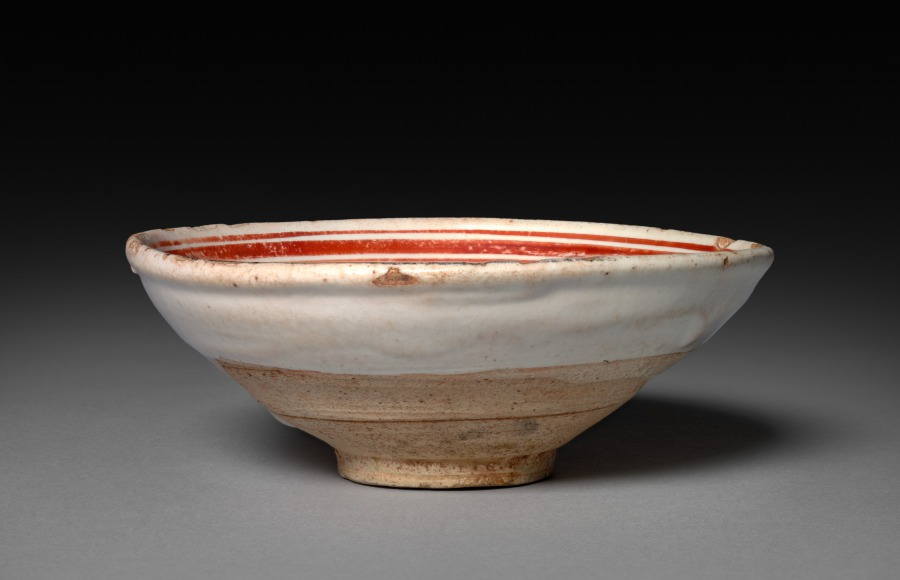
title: Cup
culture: China, Jin dynasty (1115-1234)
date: 1100s–1200s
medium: buff stoneware with underglaze slip application and overglaze enamel decoration, Cizhou ware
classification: Ceramic